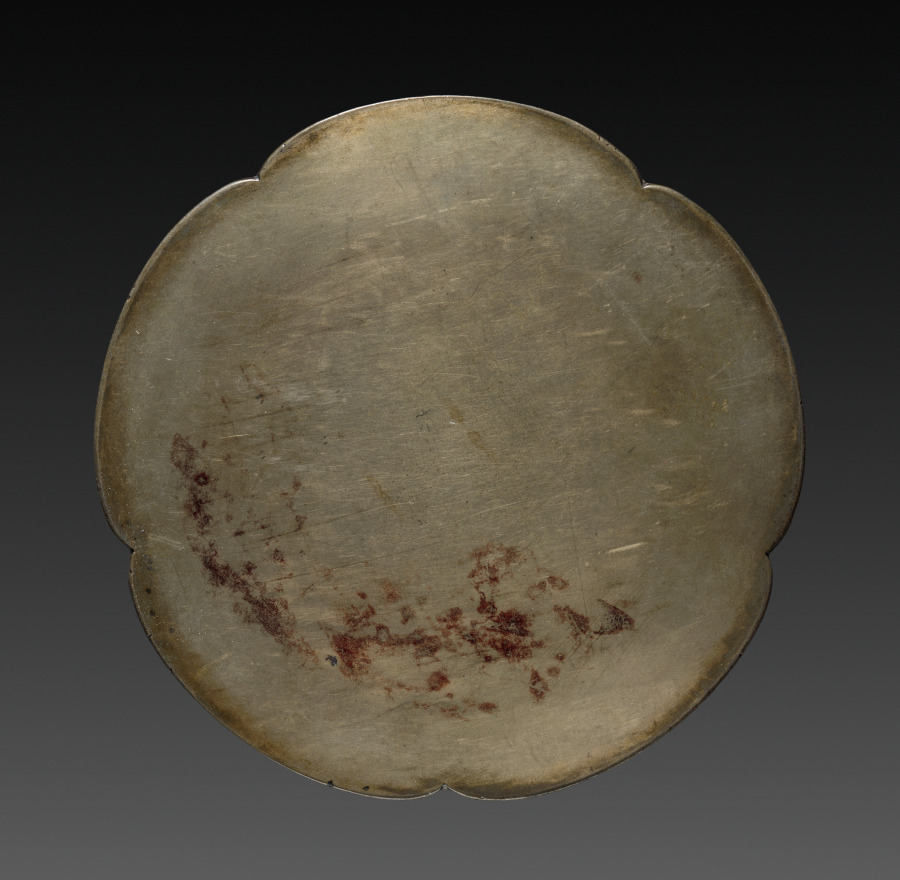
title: Mirror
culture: Japan, Heian period (794–1185)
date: 794–1185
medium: bronze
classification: Metalwork